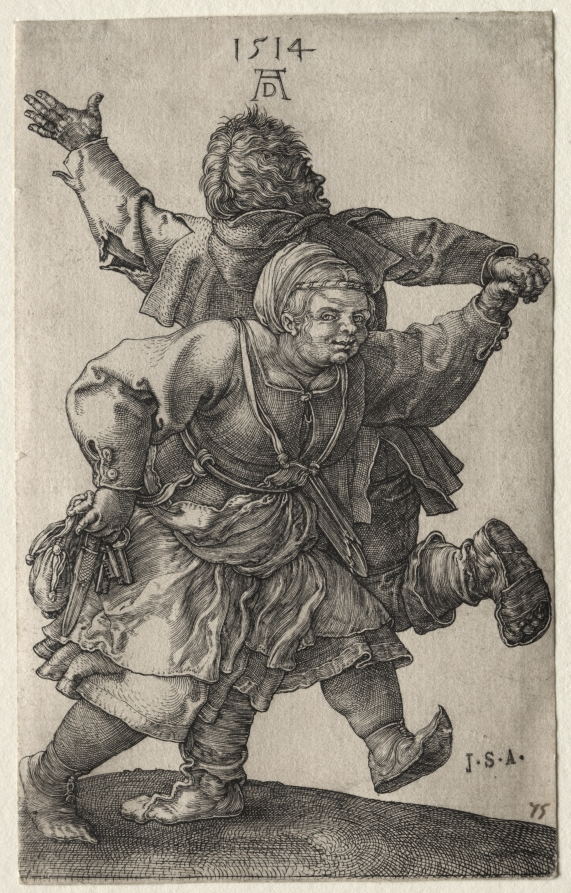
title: Peasant Couple Dancing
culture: Germany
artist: Albrecht Dürer (German, 1471–1528)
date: 1514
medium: engraving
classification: Print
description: Since the 1400s, scenes of country peasants celebrating and dancing were common in northern art; such images often pictured the rural classes as rowdy, uncivilized, and prone to indulgence. In contrast, Dürer presented the country folk displayed here as monumental figures in extraordinary detail, thus elevating the subject. Dürer’s depictions are commentaries on social order and demonstrate his interests in humanity as well as the study of human proportion. Even though the role of gender in Dürer’s peasant scenes is scarcely discussed, he clearly locates the woman as the focal point of this engraving. As her companion hollers and waves his arm in reckless abandon, the stout woman appears deliberate in her movements. She gazes assertively at the viewer while drawing attention to the keys, purse, and knife at her waist—symbols of authority and power.